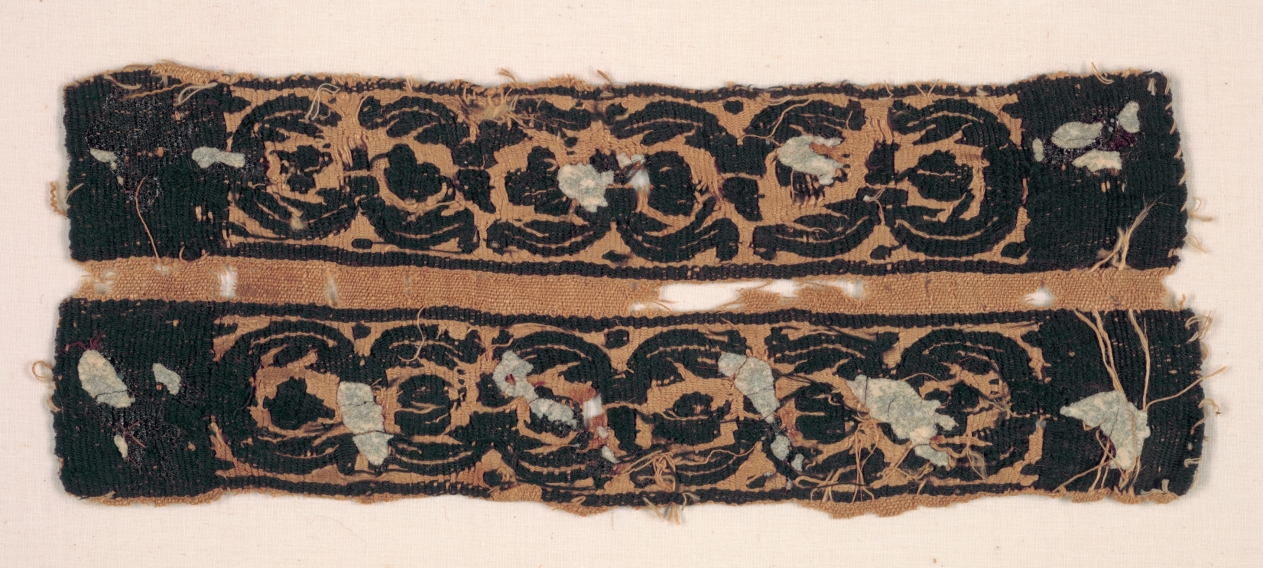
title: Sleeve Band from a Tunic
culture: Egypt, Byzantine period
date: 400s - 500s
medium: tabby weave with inwoven tapestry ornament, linen and wool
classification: Textile